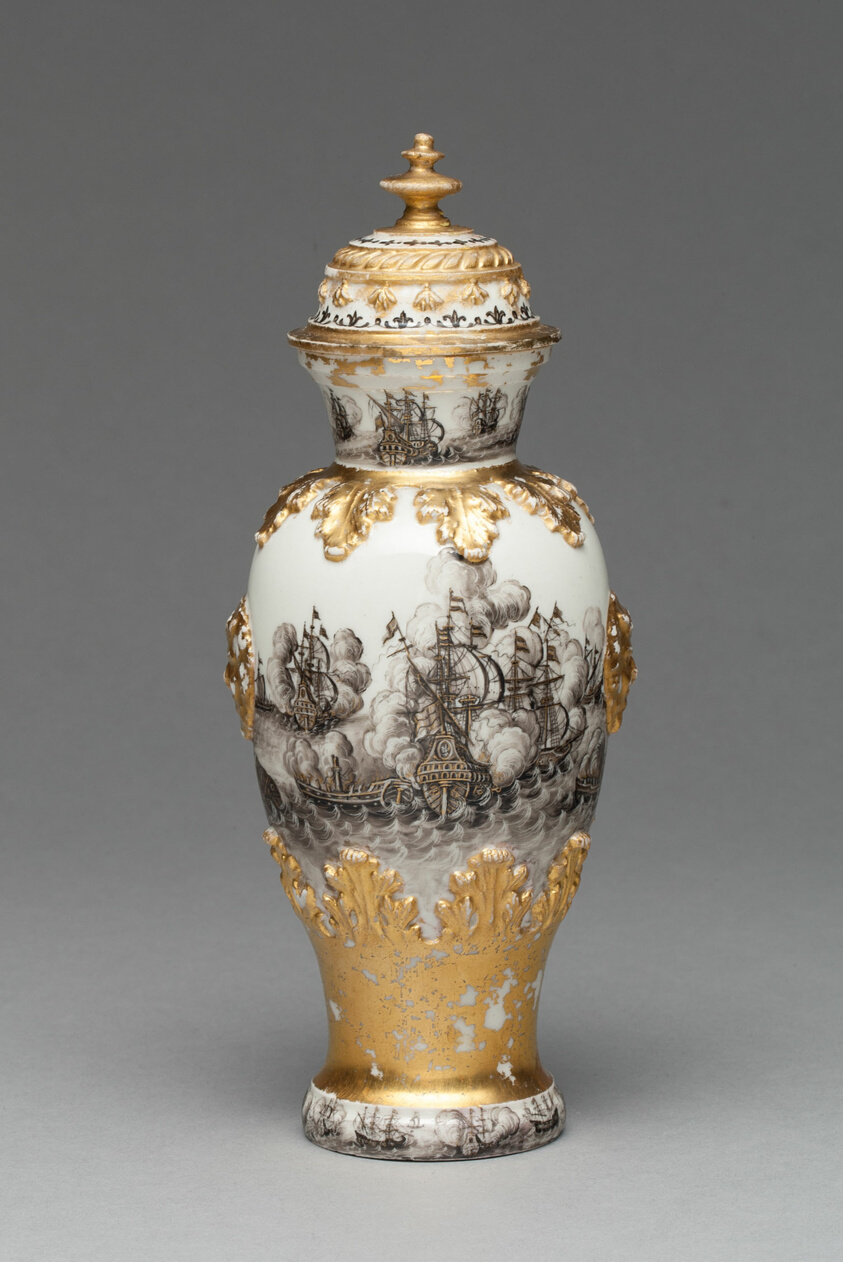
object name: Ceramics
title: Vase and Cover (one of a pair)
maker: Meissen Porcelain Manufactory; German, founded 1710; Decorated by Ignaz Preissler (German, 1676-1741)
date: 1715/20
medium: Hard-paste porcelain, black enamel (schwarzlot), gilding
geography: Meissen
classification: vase; porcelain; vessel; ceramics; european decorative arts